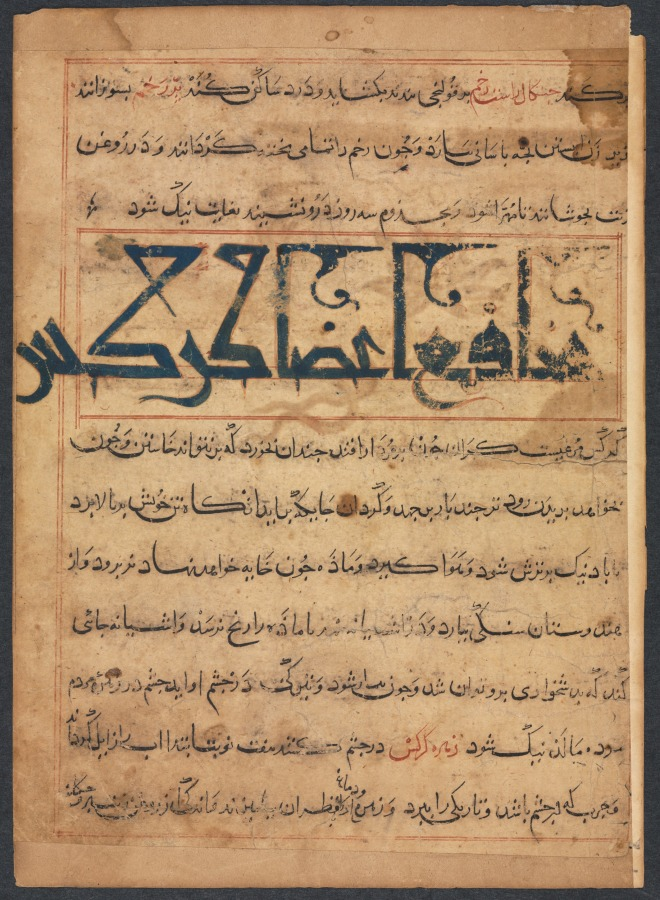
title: "Benefits of the Parts of Vultures" (From the Manafi' al-Haywan of Abu Sai'd Ubayd-Allay Ibn Bakhtishu) (recto)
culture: Iran, Marageh, Mongol Period (Ikhanid), late 13th Century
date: late 1200s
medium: opaque watercolor, ink and gold on paper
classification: Manuscript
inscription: Script: Naskh